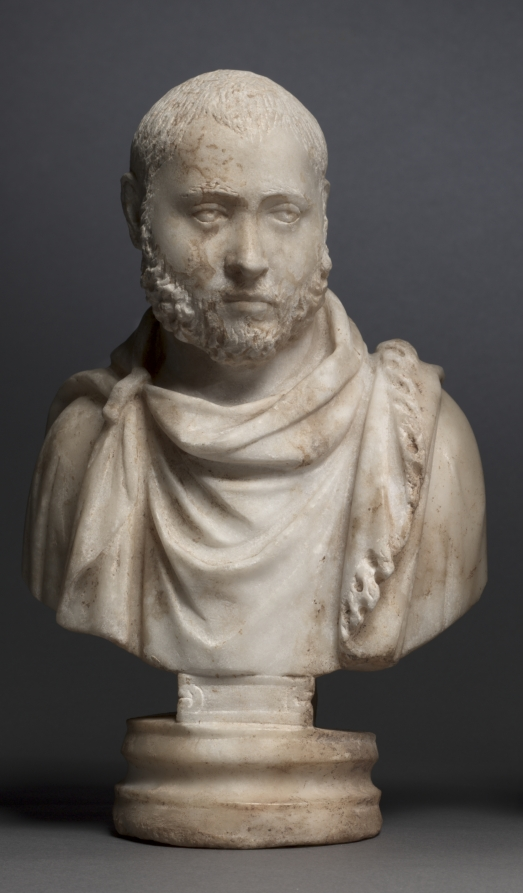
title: Portrait Bust of an Aristocratic Man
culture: Anatolia, late Roman-early Christian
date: 280–90 CE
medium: marble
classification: Sculpture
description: These three pairs of marble portrait busts depict an aristocratic Roman couple. They are unique in representing the same couple three times with only minor variations in costume. Allegedly found together with the Jonah Marbles, they may represent the Christian patrons who commissioned the Jonah cycle.